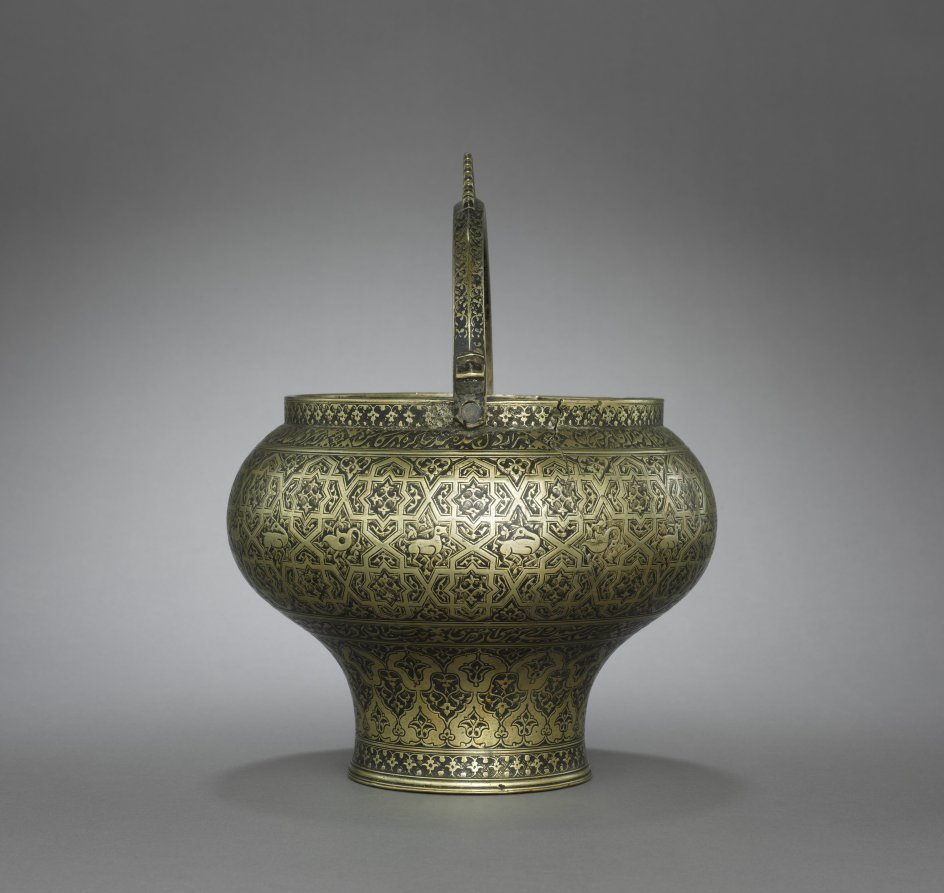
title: Bath Pail (Satl)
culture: Iran, Isfahan, Safavid period (1501-1722)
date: c. 1580–1610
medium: cast brass, turned, engraved, inlaid with black compound (niello)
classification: Metalwork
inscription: Upper band: At the breath of dawn [my Beloved] came from her house toward the Bath,/ A thousand hearts became dust on the road beneath her steps./ From seeing Your face, the bath-house day and night/ [Has] a thousand colored eyes on the door and ceiling./ As soon as my Moon [-faced Beloved] comes into the Bath,/ My eye becomes this bathing cup, and by eyebrow its handle.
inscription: Lower band: I remember an old master saying in the Bathhouse:/ One day a young person asked of an old man:/ "What is the secret that makes anyone who sets foot in the bathhouse,/ Find his saddened heart opened up to joy?"/ He said: "The secret is that the bather has nothing of the trappings of this world/ But a bathing-bowl and towel -- and even those belong to others.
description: Building on the tradition of ancient Roman baths, the hammam (public bath) was, and still is, an integral part of social life in the Islamic world. This pail was used to carry bathing equipment for a wealthy individual from their home to the hammam. It is decorated with an interlacing geometric design with a central band of repeating animals. Bathing was a popular theme with Iranian poets. On this piece, verses by the celebrated poet Jami (died 1492) relay the story of a youth inquiring as to why the hammam brings so much joy. An elder responds, “The secret is that the bather has nothing of the trappings of this world / But a bathing-bowl and towel—and even those belong to others.”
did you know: Three animal motifs are repeated within the geometric interlacing: a doe with its head turned backward; a water fowl; and a horned animal, possibly an ibex.